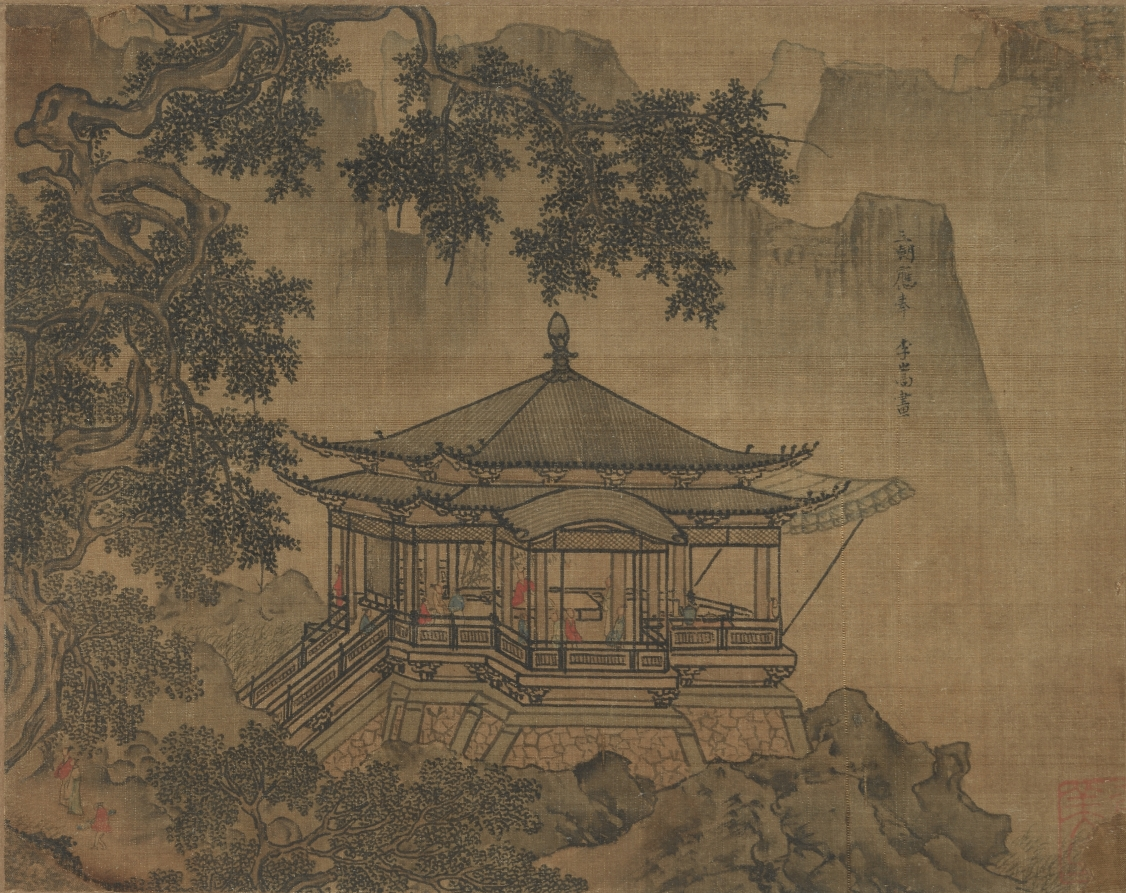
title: A Pavilion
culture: China, Southern Song Dynasty (1127-1279) ?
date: 1127–1279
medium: album leaf; ink and color on silk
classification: Painting